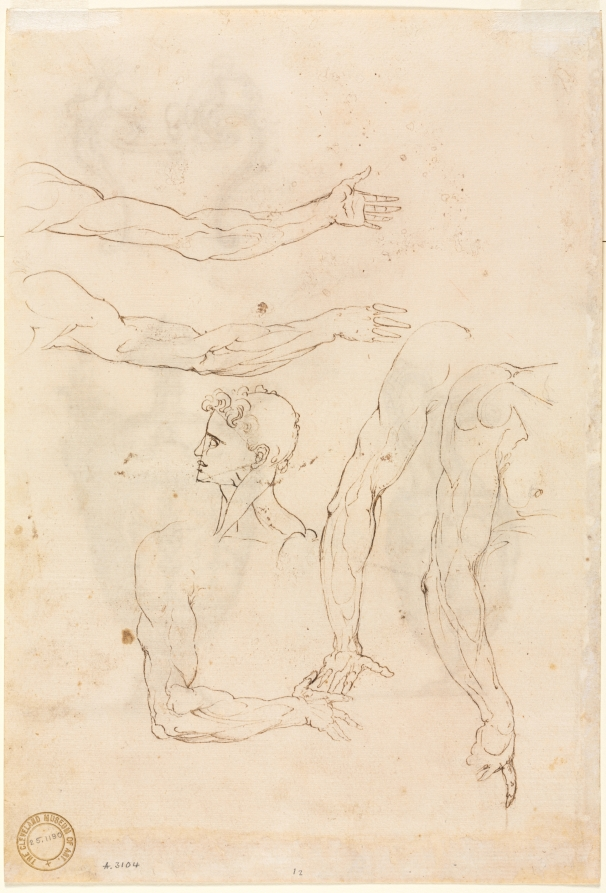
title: Sketches of Five Arms and a Head (verso)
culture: Italy, 16th century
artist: Luzio Romano (Italian, active 1528–75)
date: mid 1500s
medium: pen and brown ink and brush and brown wash, and charcoal underdrawing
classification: Drawing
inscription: lower left, in graphite: A. 3104 ; lower center, in graphite: 12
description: Luzio Romano’s drawing of arms and a head were made from a flayed body (a cadaver with its skin removed). The triangle placed over the facial profile points to the Renaissance artist’s interest in geometry and to the idea that the human body is the primary model of perfect proportions.